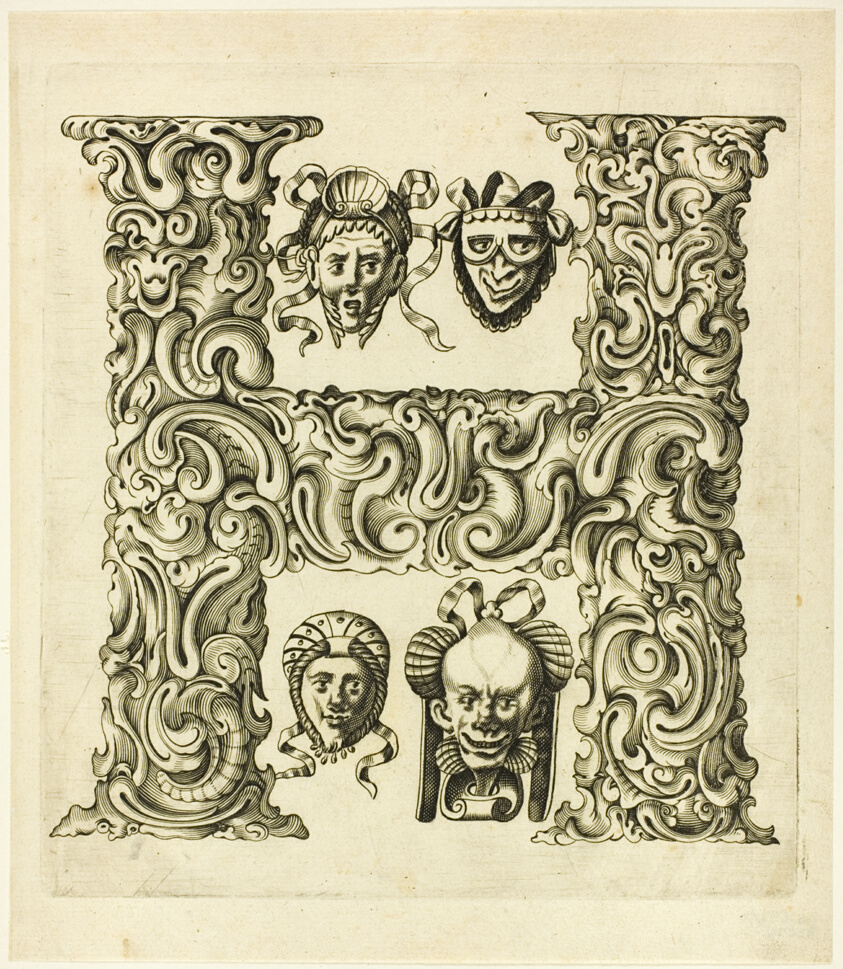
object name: Print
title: Letter H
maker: Peter Aubry (German, 1596-1668)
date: 1630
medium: Engraving on paper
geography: Germany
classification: engraving; print; prints and drawing